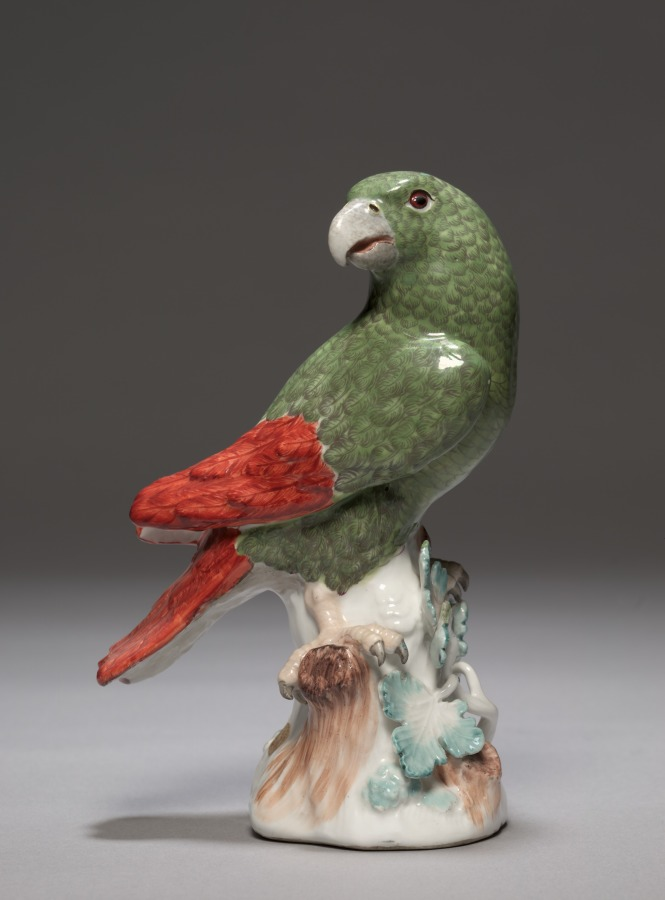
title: Candelabrum with Parrot (Parrot)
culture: Germany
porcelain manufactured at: Meissen Porcelain Factory (German, est. c. 1710)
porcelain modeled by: Johann Joachim Kändler (German, 1706–1768)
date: c. 1740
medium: porcelain mounted in gilt bronze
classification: Ceramic